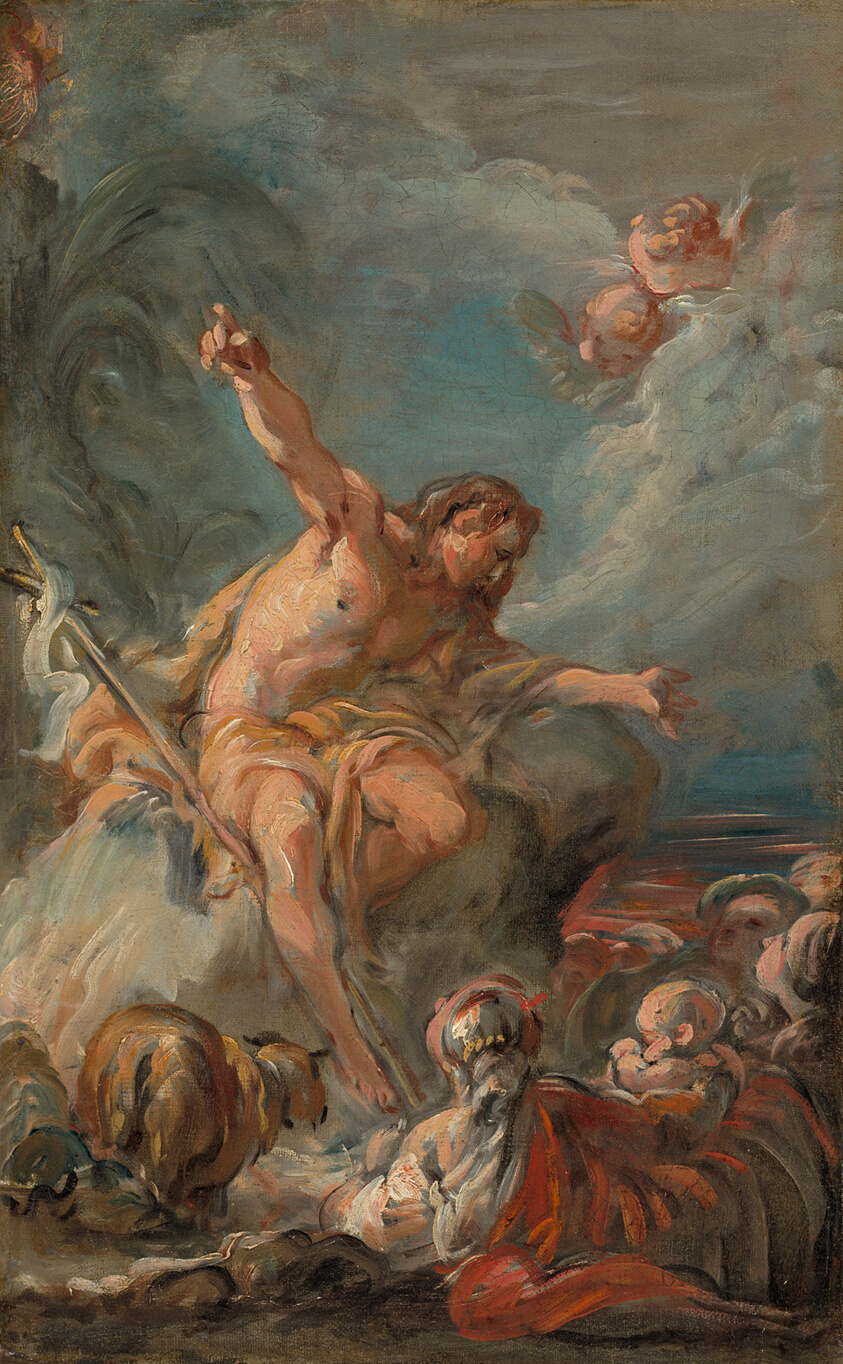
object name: Painting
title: Saint John the Baptist Preaching in the Desert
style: 18th Century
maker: Jean Baptiste Henri Deshays (French, 1729–1765)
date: c. 1758–64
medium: Oil on canvas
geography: France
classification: oil on canvas; france; french; oil paintings (visual works); paint; painting; european painting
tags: Saint John the Baptist, women, animals, figures, people, angels, putti, deserts, saints, Christianity, Christian subjects, religious, religion, religious scenes, biblical